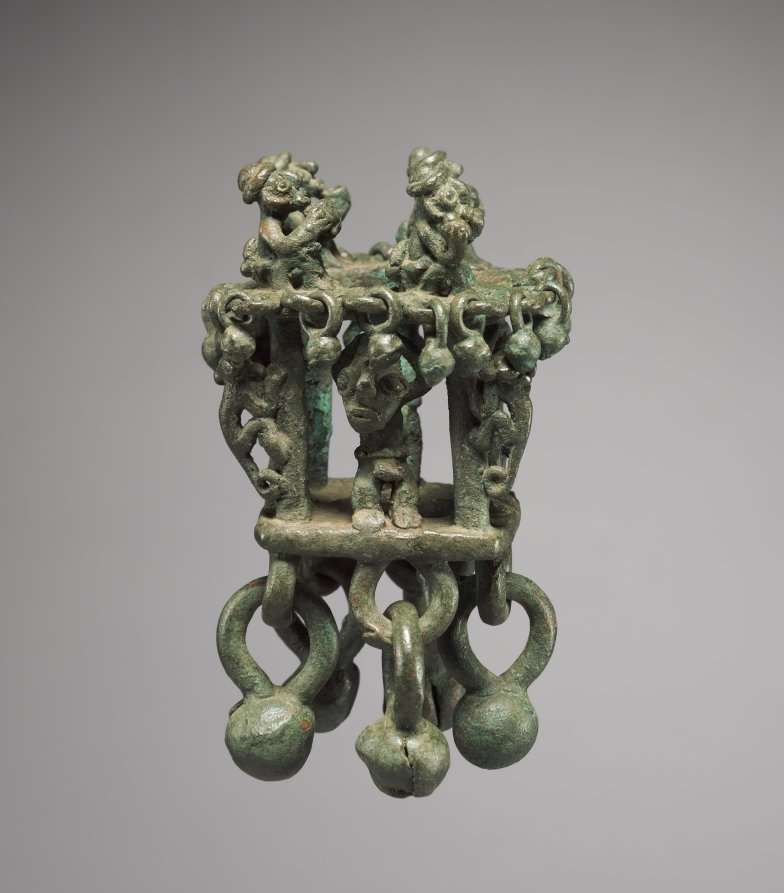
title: Finial of a Staff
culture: Peru, North Coast, Chimú style (900-1470)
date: Chimú style (900–1470)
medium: cast copper alloy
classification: Metalwork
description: Look carefully at this scepter top; the corrosion obscures details, but the scene is interesting.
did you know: Many ancient Andean artworks incorporate the element of sound.